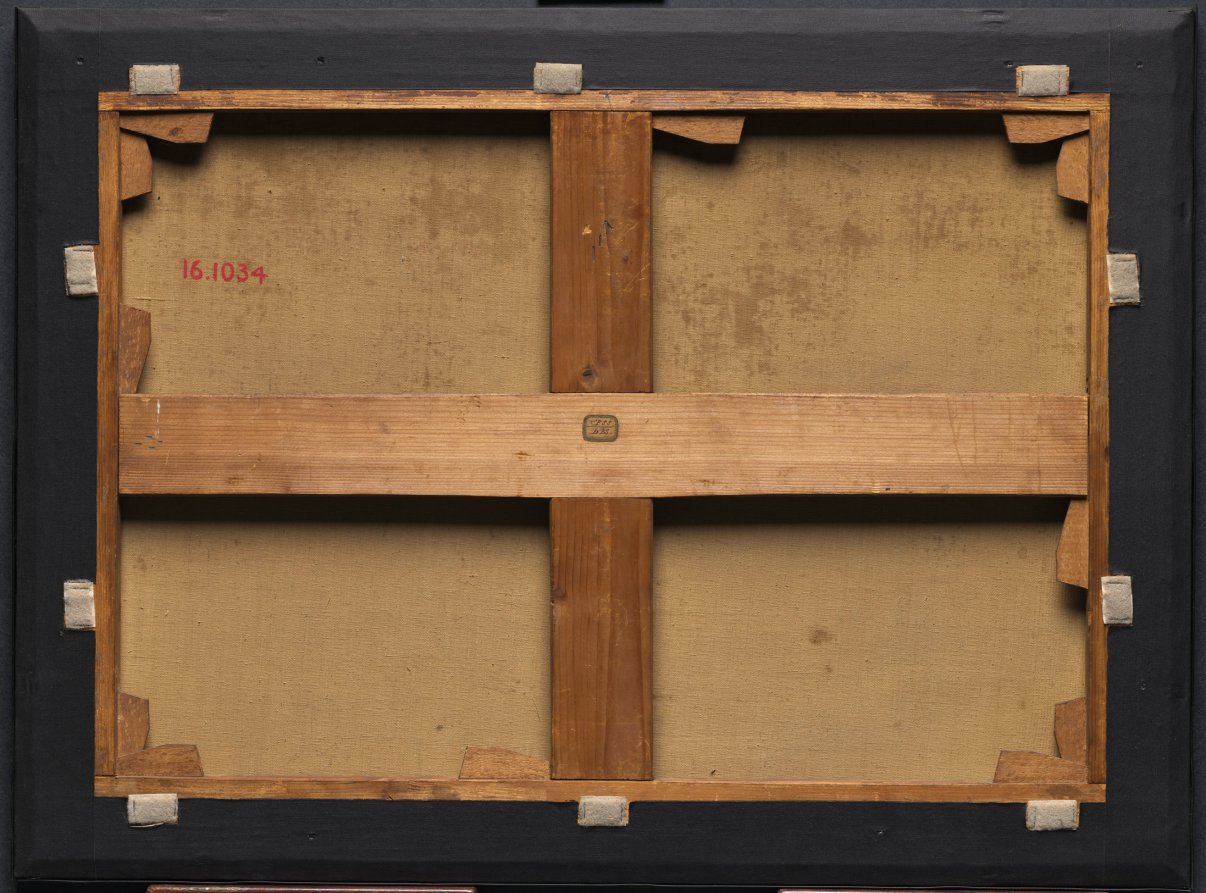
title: Greek Pirates Attacking a Turkish Vessel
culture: France, 19th century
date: not dated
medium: oil on fabric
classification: Painting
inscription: Signed lower left: E Isabey. 1827